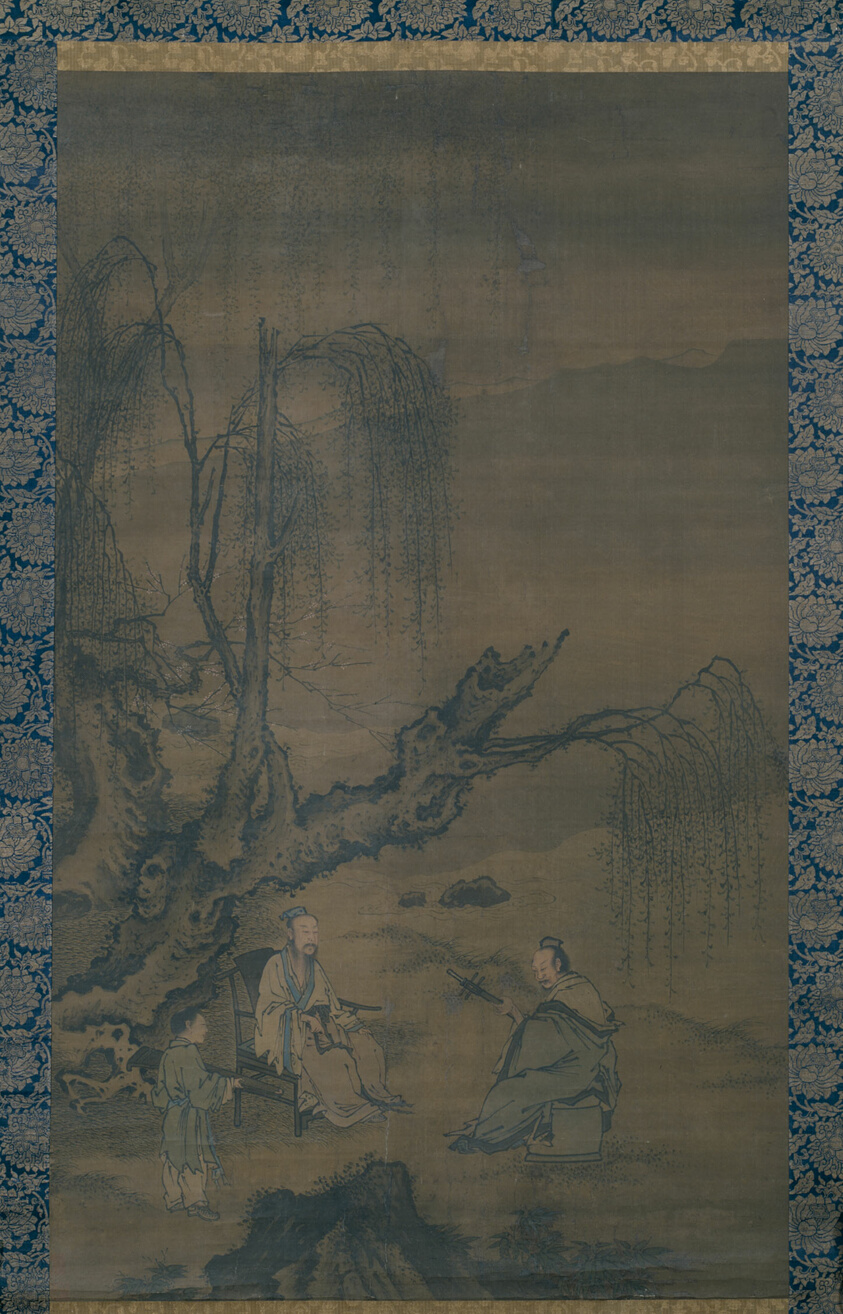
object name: Painting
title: Two Scholar-Musicians in a Landscape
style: Chinese (culture or style)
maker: Artist unknown (Chinese, active 15th century)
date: Ming dynasty (1368–1644), 15th century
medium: Hanging scroll; ink and color on silk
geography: China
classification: hanging scroll; painting; asian art